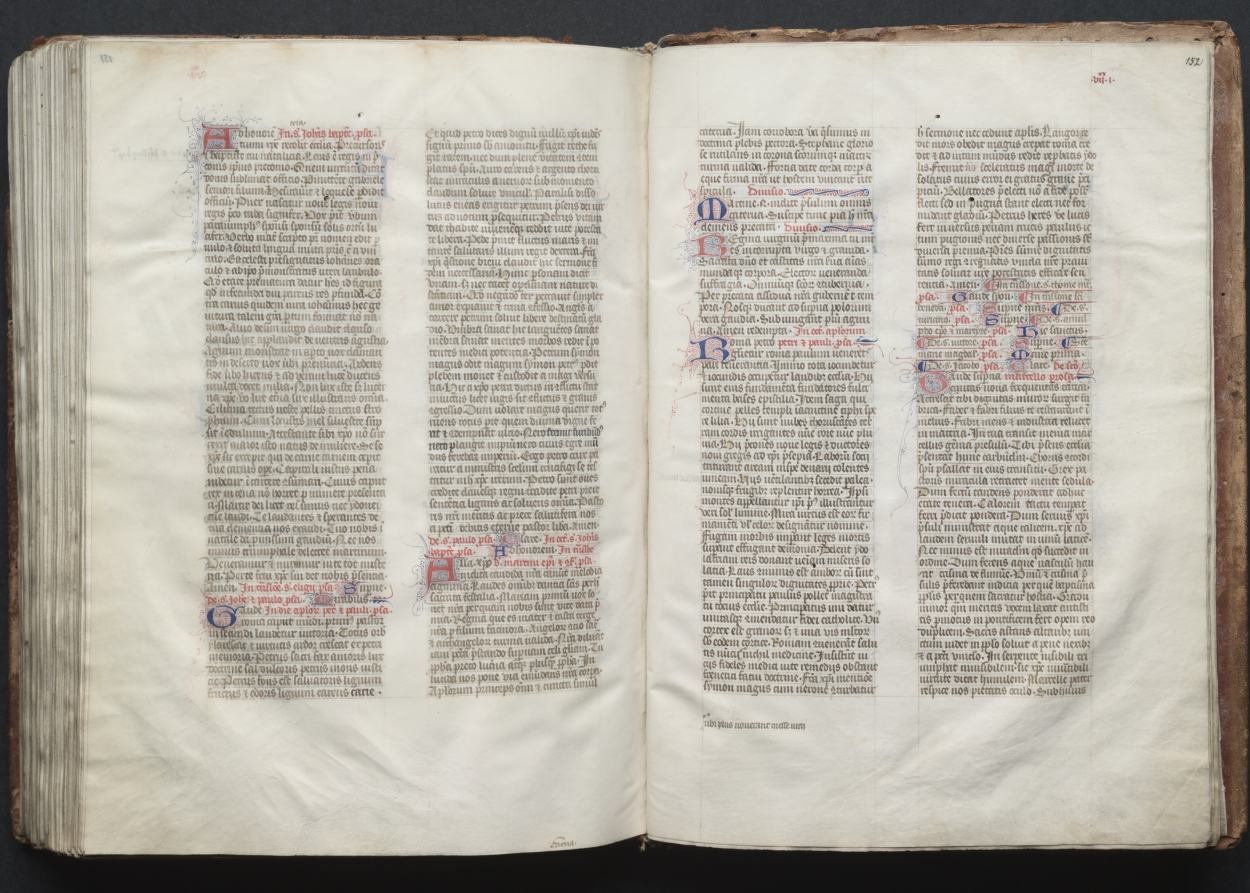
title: The Gotha Missal: Fol. 151v, Text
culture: France, Paris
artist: Master of the Boqueteaux (French)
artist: and Workshop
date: c. 1375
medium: ink, tempera, and gold on vellum; blind-tooled leather binding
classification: Bound Volume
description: The style and quality of this manuscript's decoration is typical of deluxe Parisian books made for aristocratic or royal patrons. Most of the book's decoration appears to be the work of the Master of the Boqueteaux, an artist active at the court of King Charles V (died 1380). His style was apparently shared by a number of book illuminators working in and around Paris. It is very possible that the Gotha Missal belonged to Charles V, but is not provable because the manuscript has no royal portraits and lacks a colophon. Given the book's magnificent decoration, however, it would seem that it was produced for a Valois prince, if not for the king himself. The manuscript receives its name from the German dukes of Gotha, its later owners.